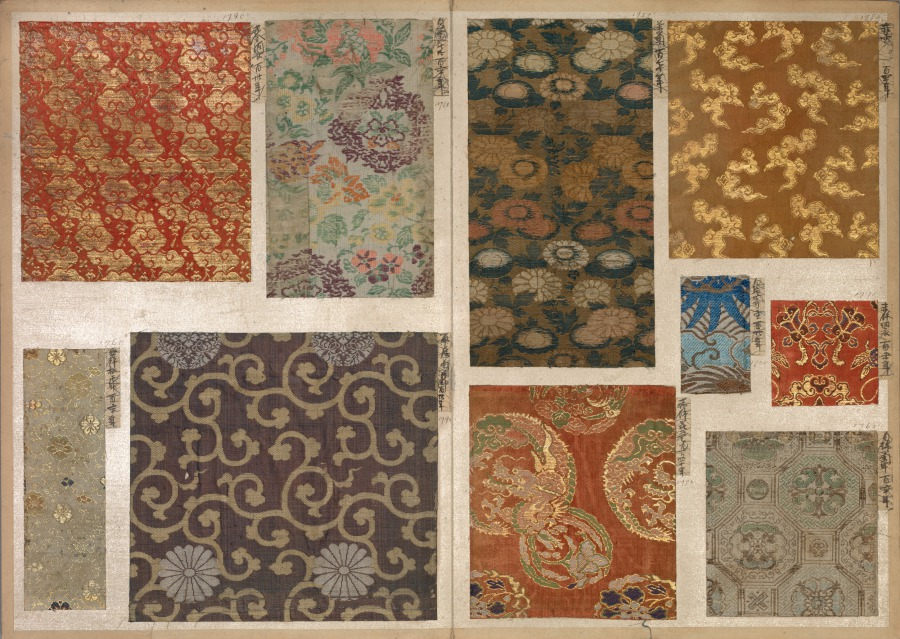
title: Album of Textile Samples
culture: Japan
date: 1790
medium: silk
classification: Textile